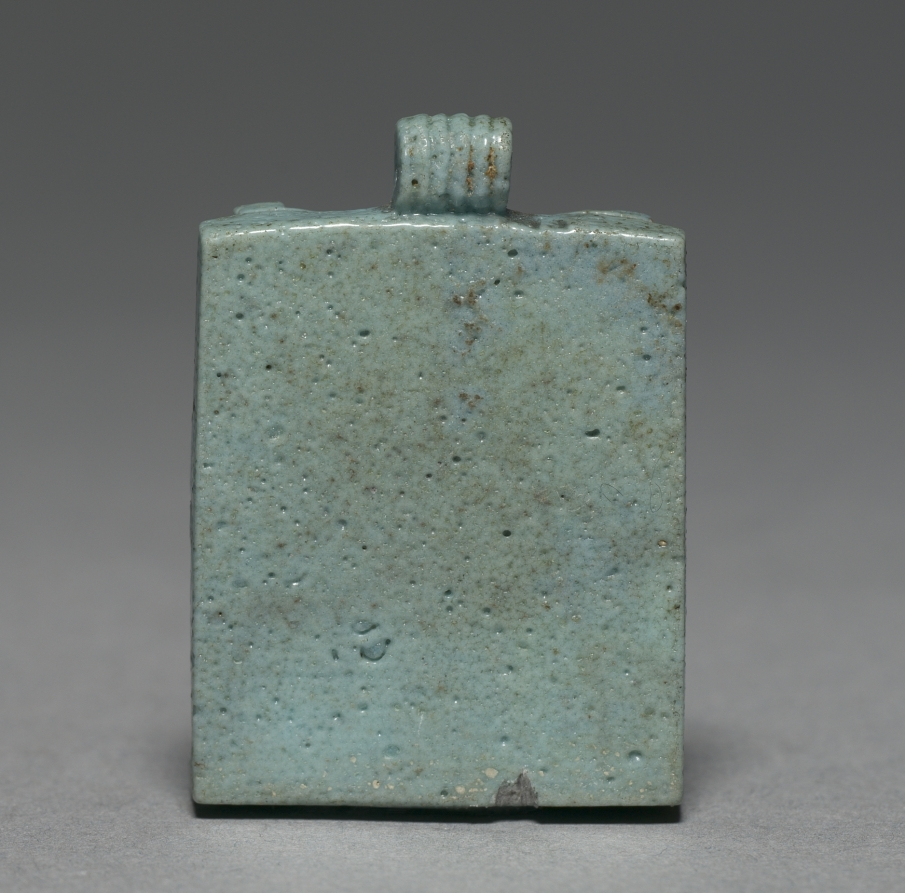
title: Triad: Horus between Isis and Nephthys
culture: Egypt, Late period (715–332 BCE), Dynasty 26 or later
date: 664–525 BCE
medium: pale turquoise faience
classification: Amulets